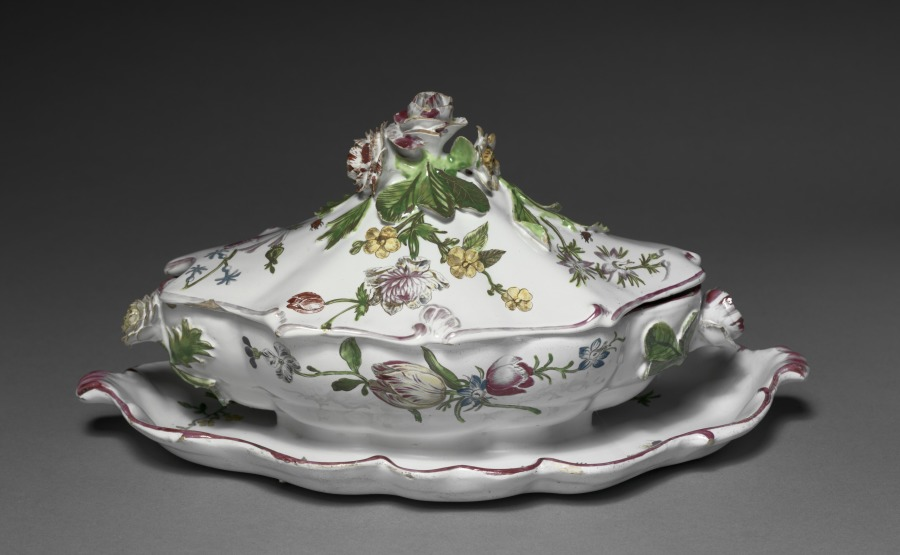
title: Covered Sauce Tureen with Attached Stand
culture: France, Marseilles, 18th century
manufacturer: Veuve Perrin Factory (French)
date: c. 1765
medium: tin-glazed earthenware (faience) with enamel decoration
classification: Ceramic